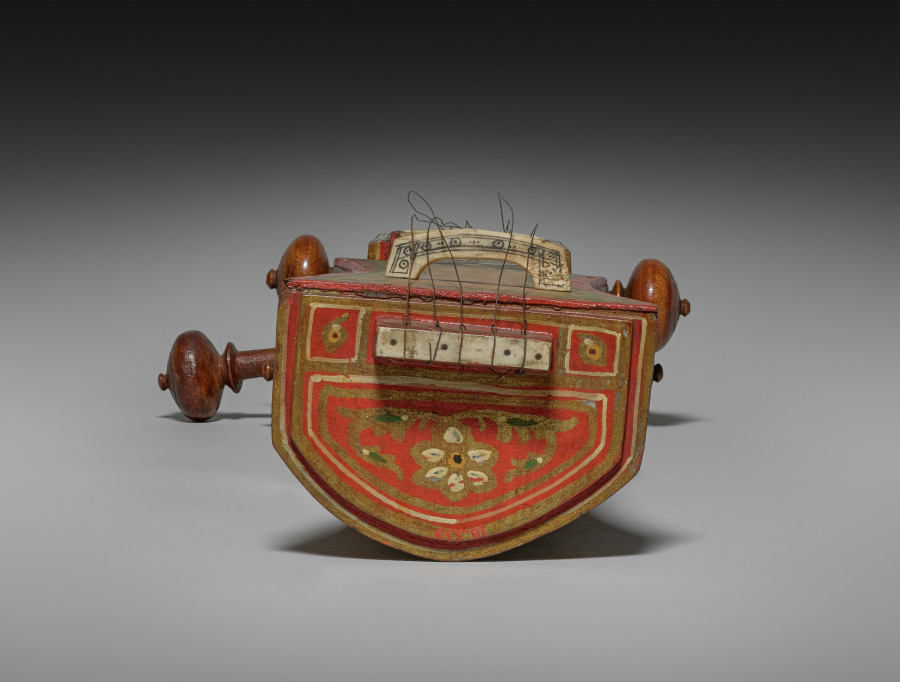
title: Sarangi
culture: India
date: 1800s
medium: Gum tempera and gold on wood with mother-of-pearl and bone or ivory inlays; metal strings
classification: Musical Instrument